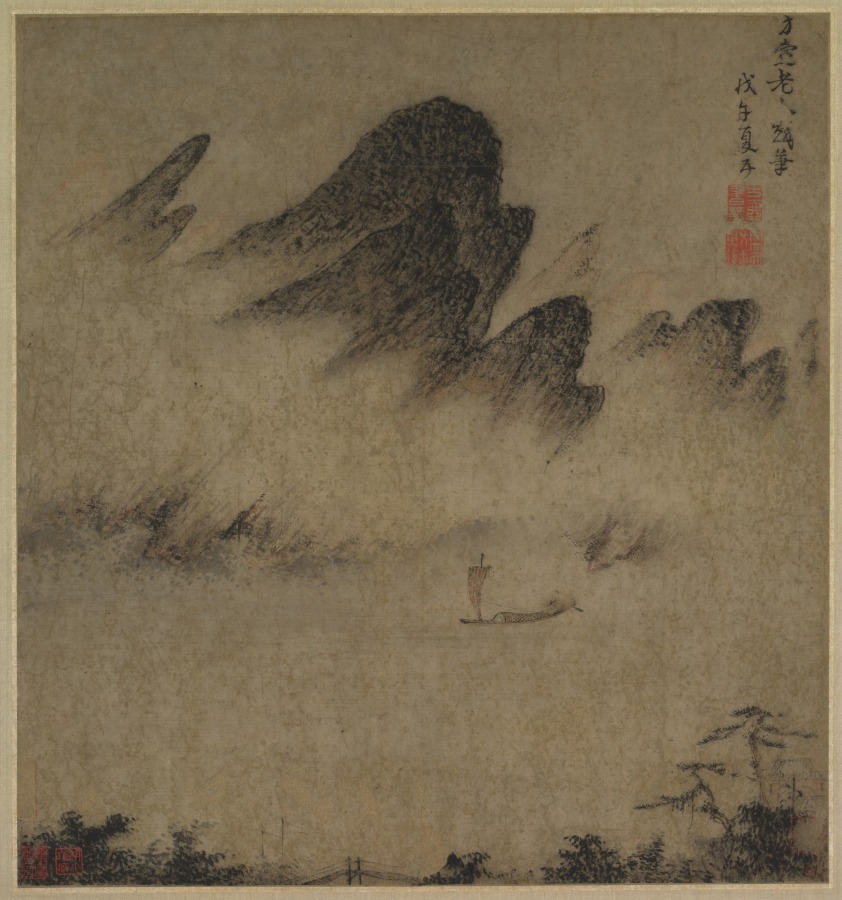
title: Landscape Ink-Play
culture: China, Yuan dynasty (1271-1368)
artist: Fang Congyi (Chinese, active c. 1340–80)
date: 1300s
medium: hanging scroll; ink and color on paper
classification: Painting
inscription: Inscription and 2 seals in the upper right. 2 complete seals and 1 partial in the lower left.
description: The painter created a paradoxical juxtaposition of the boat serenely sailing against the turbulent onrushing movement of the towering mountains in the background.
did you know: Fang Congyi was a painter and a Daoist priest.